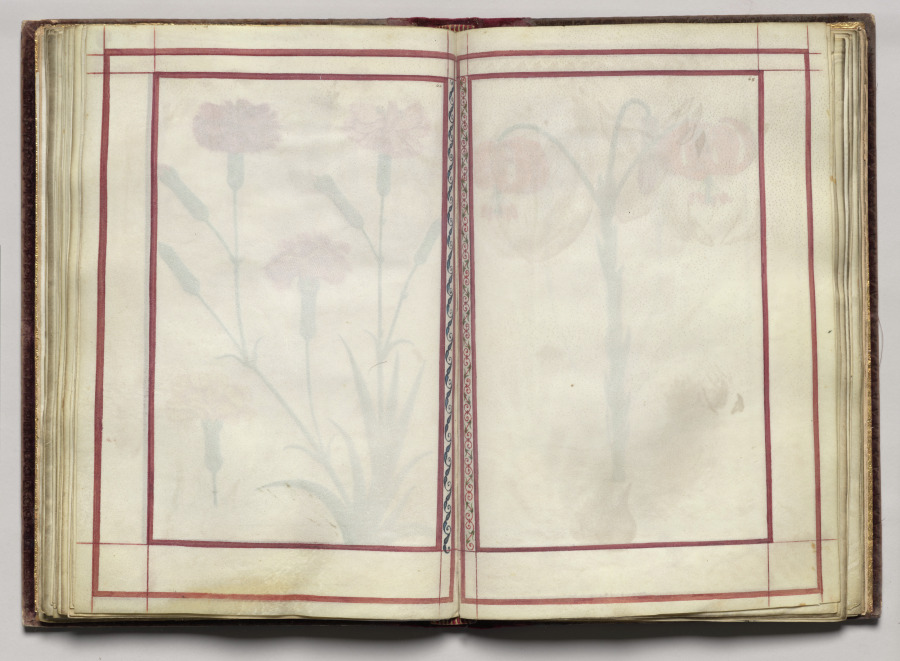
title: Border, folio 31 (verso), from Florilegium (A Book of Flower Studies)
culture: France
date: 1608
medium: watercolor, ink, silver and gold over occasional traces of pencil, on vellum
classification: Bound Volume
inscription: Dated: Poitiers 1608 (on frontispiece) Signed: On frontispiece in black ink, lower right: Van Kuyk Notation on drawing: Frontispiece: in pencil, lower margin: * élève de Van Kessel, peintre flammand (* in pencil also appears in front of Van Kuyk's name).